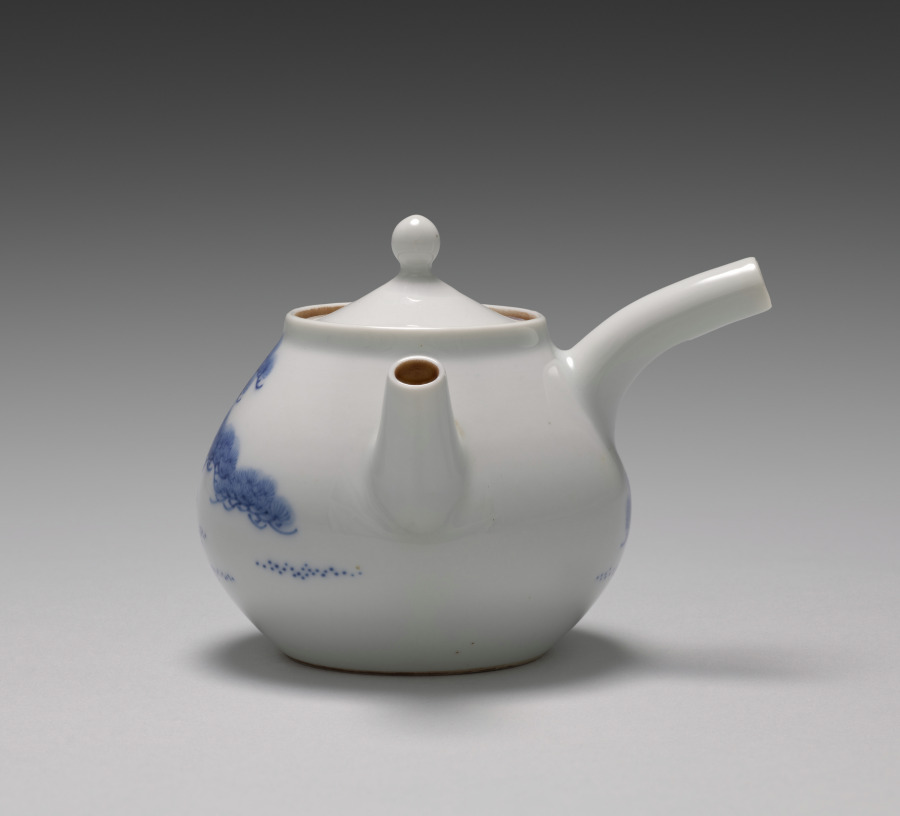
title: Teapot with Pines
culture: Japan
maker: Seifū Yohei III (Japanese, 1851–1914)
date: 1893–1914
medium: Porcelain with underglaze blue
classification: Ceramic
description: Side-handled teapots known as kyūsu and hot water coolers, or yuzamashi, are essential components of sencha tea sets. The teapot is, of course, meant for steeping and serving the tea. Yuzamashi are used to cool boiled water to the ideal temperature for the type of tea to be brewed. This teapot has a pine in underglaze blue on each side. The tip of one of these pines reaches onto the tiny lid, and as with the trees on the Water Cooler with Pines, CMA 2022.163, the trunks are curvy ribbons with little definition. Considering the execution of the two vessels' designs, one might imagine the pot and cooler to have been part of the same set.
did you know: This teapot with images of pines are among Seifū Yohei III’s designs painted in blue.